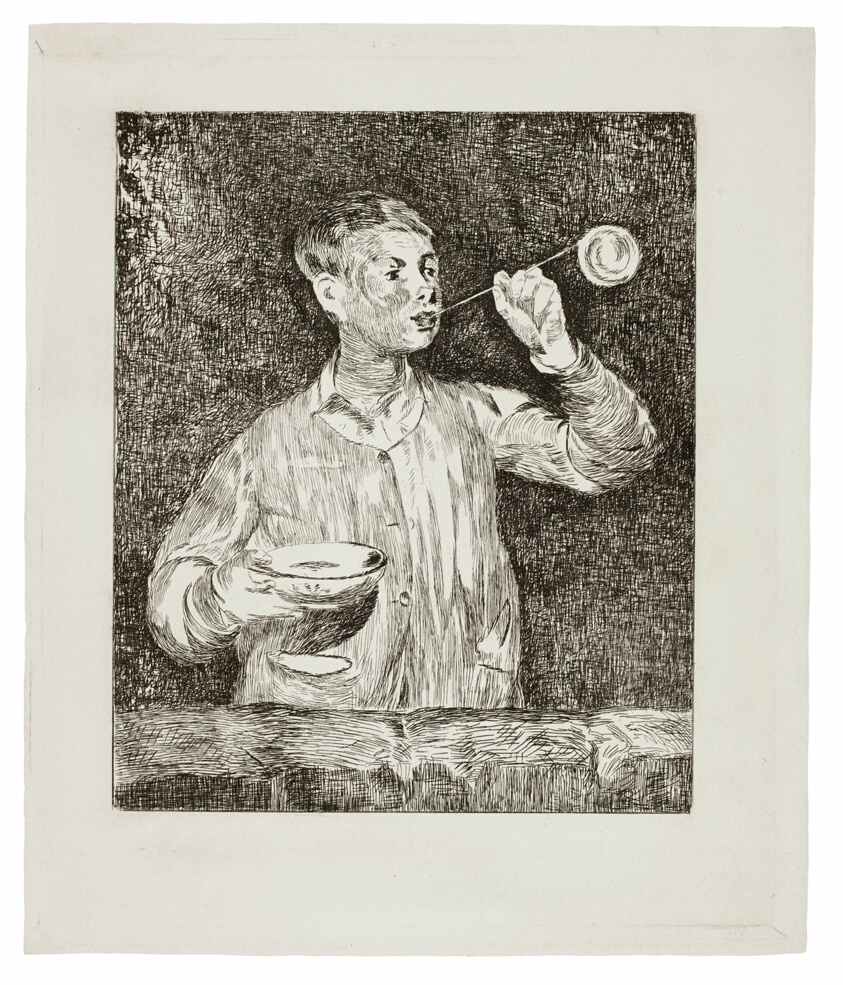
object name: Print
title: Boy Blowing Soap Bubbles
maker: Édouard Manet (French, 1832-1883)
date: late 1868/early 1869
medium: Etching in warm black on ivory wove paper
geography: France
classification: etching; print; prints and drawing